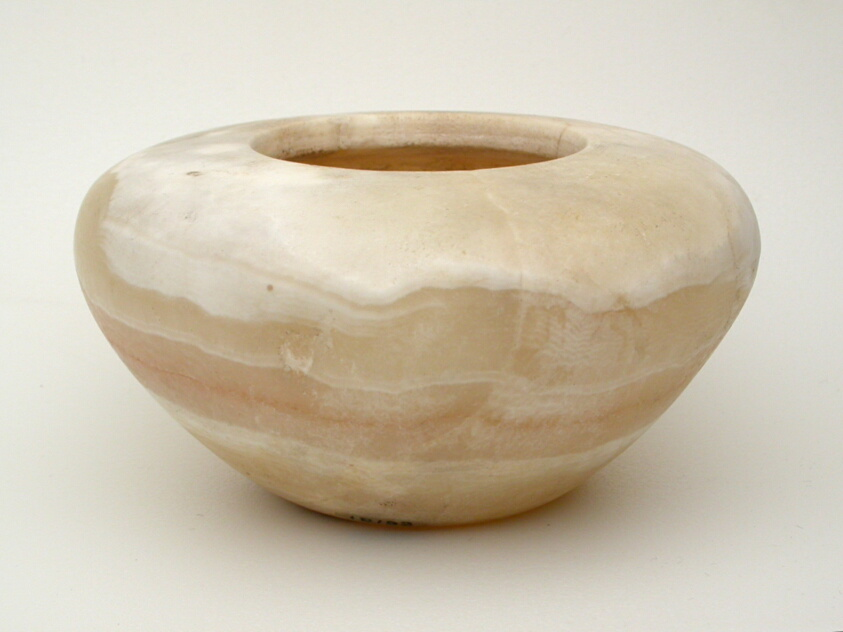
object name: Vessel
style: egyptian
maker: Egyptian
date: Early Dynastic Period–Early Old Kingdom, Dynasty 1–3 (about 3000–2613 BCE)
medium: Travertine (Egyptian alabaster)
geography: Egypt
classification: vessel; stone; ancient art